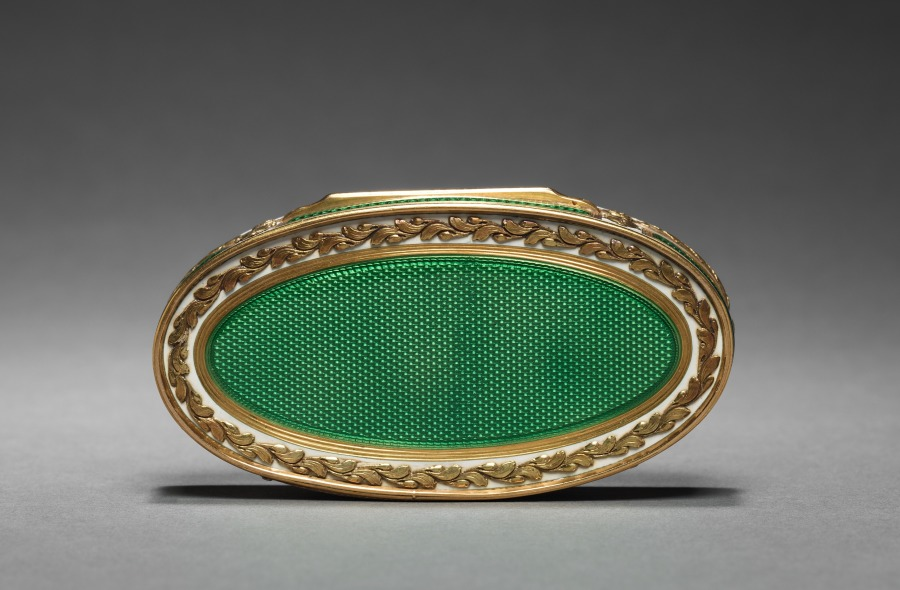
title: Snuff Box (Tabatière) with Portrait of Marie-Thérèse of Austria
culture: France, 18th century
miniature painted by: Jean Petitot (Swiss, 1607–1691)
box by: Charles Le Bastier (French)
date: miniature, c. 1676; box, 1775–76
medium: Gold, enamel, and miniature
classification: Enamel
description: In 18th-century France, ornately enameled boxes that held snuff—powdered tobacco—became a popular accessory in the French court. This box is decorated with a miniature portrait of Marie-Thérèse of Austria, the queen consort of French King Louis XIV. Their union was largely political. A year into their marriage Louis XIV took an official mistress, Madame Pompadour.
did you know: This box resulted from the combined efforts of the popular portrait painter who served the court of French King Louis XIV, Jean Petitot, and master goldsmith Charles Le Bastier.